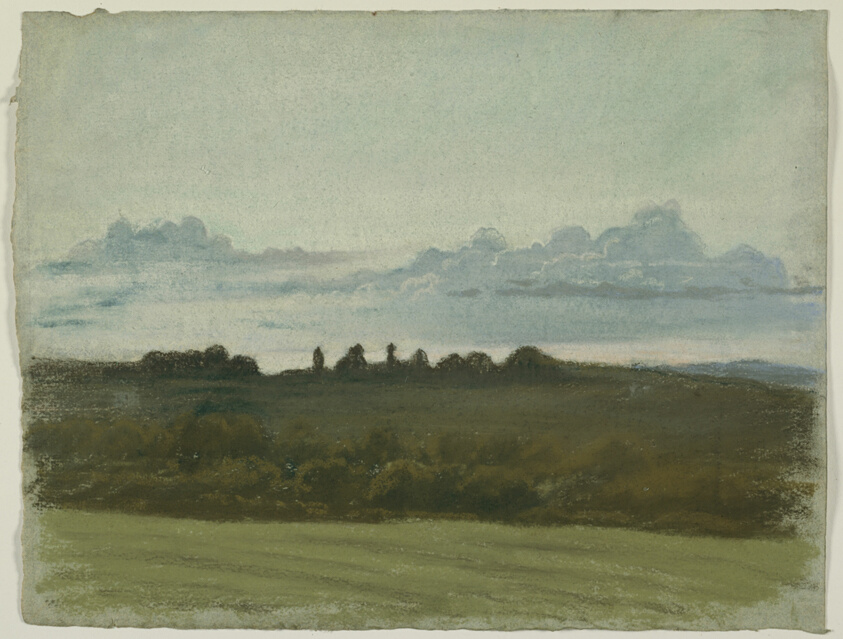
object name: Drawing and Watercolor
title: Paysage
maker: Louis Français (French, 1814-1897)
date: c. 1850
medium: Pastel on blue-gray laid paper with blue fibers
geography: France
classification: pastel; drawings (visual works); prints and drawing